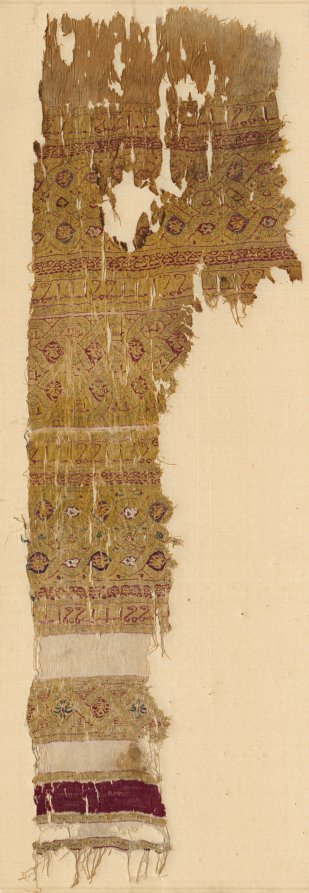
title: Tiraz with guilloche bands and fringe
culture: Egypt, Fatimid period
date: 1100s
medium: linen and silk: plain weave with inwoven tapestry weave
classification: Textile